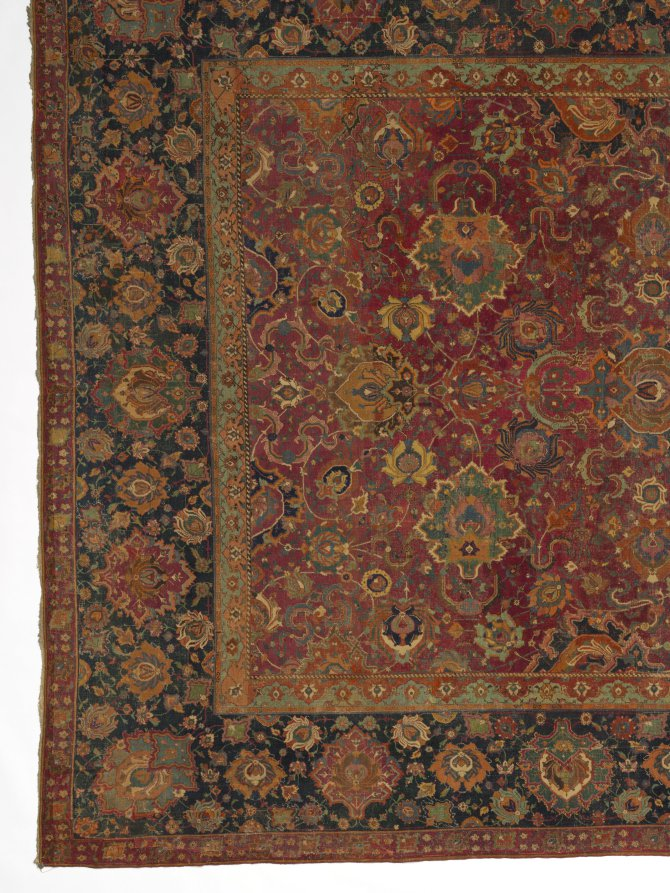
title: Carpet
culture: Iran, Herat, 16th century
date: 1500s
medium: senna knot: wool and cotton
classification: Carpet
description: The Mughals, with their nomadic Central Asian roots, were constantly on the move. They were adept at transporting the trappings of their residences and bases of operation from place to place. Fine carpets and canopies demarcated places of importance, and could be rolled up and moved when the ruler was ready to consolidate his power at a new location. When they settled in stone palaces in India, the interiors were covered with carpets, lending a warmth to the spaces that cannot be felt at the sites today. This carpet is of the type that the Mughals would have acquired for their residences. Mughal paintings are filled with depictions of carpets and textiles, many ornamented, like this one, with delicate and complex palmette-dominated arabesque patterns that evoke a paradisiacal setting.